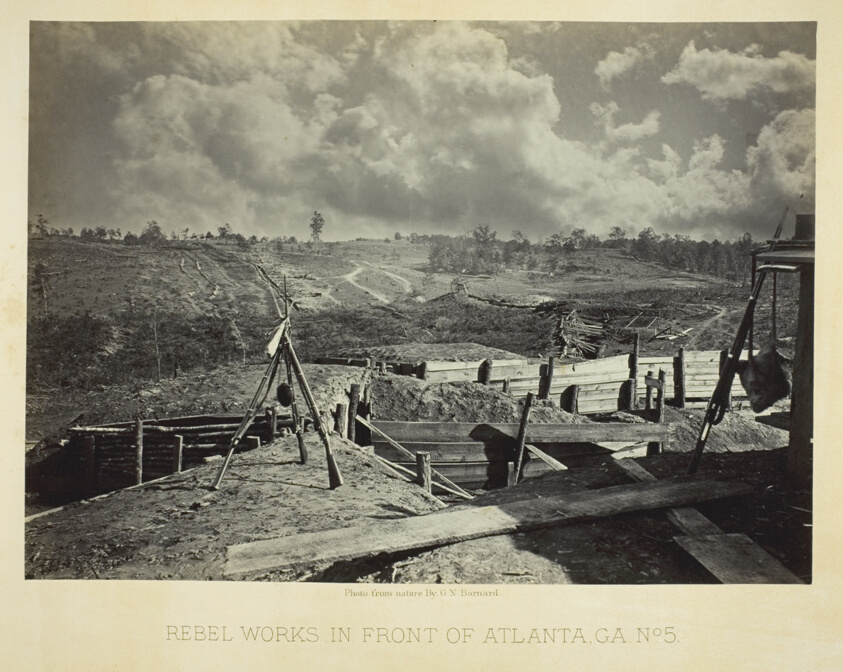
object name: Photograph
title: Rebel Works in Front of Atlanta, GA, No. 5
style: 19th century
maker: George N. Barnard (American, 1819–1902)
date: 1864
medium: Albumen print, plate 43 from the album "Photographic Views of the Sherman Campaign" (1866)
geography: United States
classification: albumen silver print; photographic process; photography; photograph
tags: Collected by Hugh Edwards, Sherman's Campaign 1866